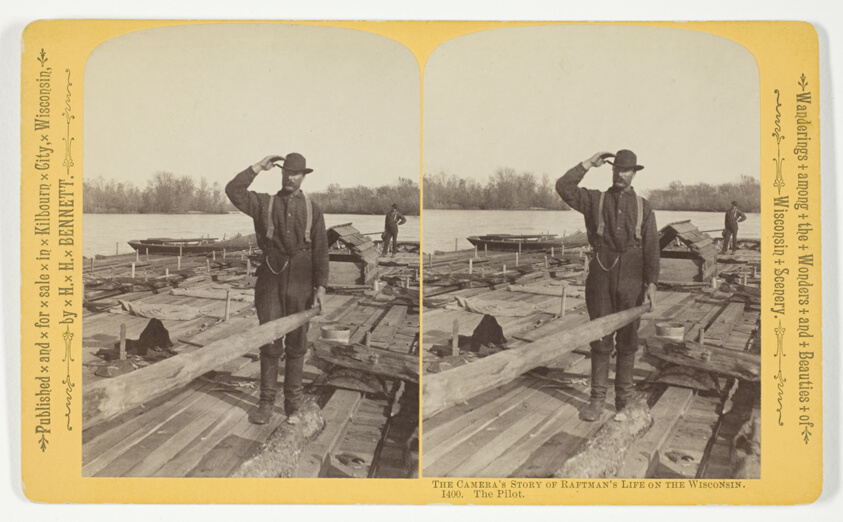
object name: Photograph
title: The Pilot, from the series "The Camera's Story of Raftman's Life on the Wisonsin"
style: 19th century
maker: Henry Hamilton Bennett (American, born Canada, 1843-1908)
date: 1886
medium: Albumen print, stereo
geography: Wisconsin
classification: photography; photograph; albumen silver print; stereograph (albumen)